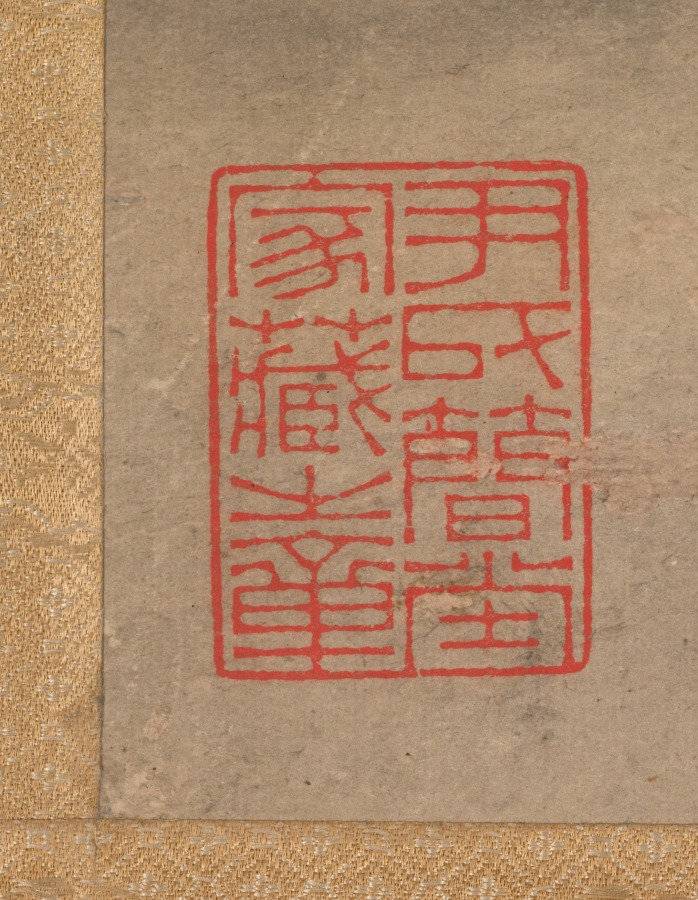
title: The Crossing of the Yangzi River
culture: China, Qing dynasty (1644-1911)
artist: Shang Rui (Chinese, 1634?-)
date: c. 1700–1720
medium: hanging scroll, ink and slight color on paper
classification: Painting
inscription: Colophons: One upper left inscription by the artist followed by two seals; one upper right inscription followed by two seals; three other seals, one in lower left